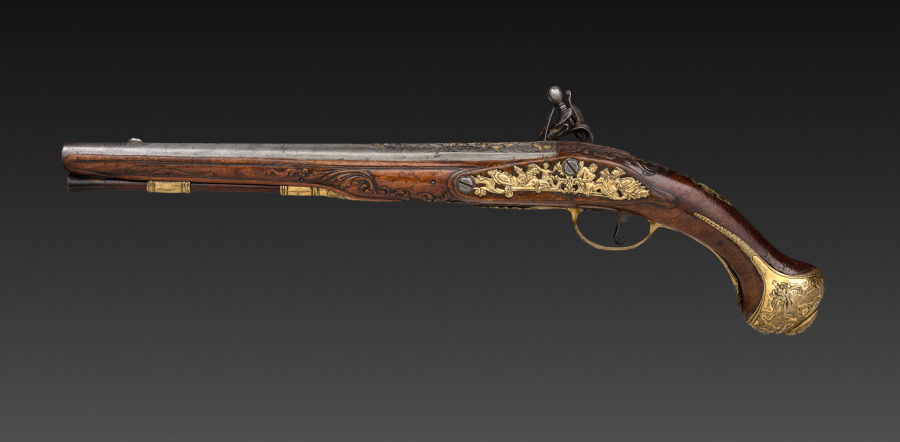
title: Flintlock Pistol (1 of 2)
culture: Franco-Flemish, Liège, early 18th century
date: early 1700s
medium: steel with gold inlay, gilt-brass mounts; walnut burl stock; chiseled high-relief decoration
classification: Arms and Armor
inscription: on barrel: G. MASSIN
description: The exquisite ornament along the breech of the barrel is chiseled and engraved. The barrel of this pistol is signed g. massin, the name of a gunsmith working in eastern France or French-speaking Flanders, possibly the city of Liège.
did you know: The flintlock ignition system was developed in the 1600s and remained the dominant system until the early 1800s.